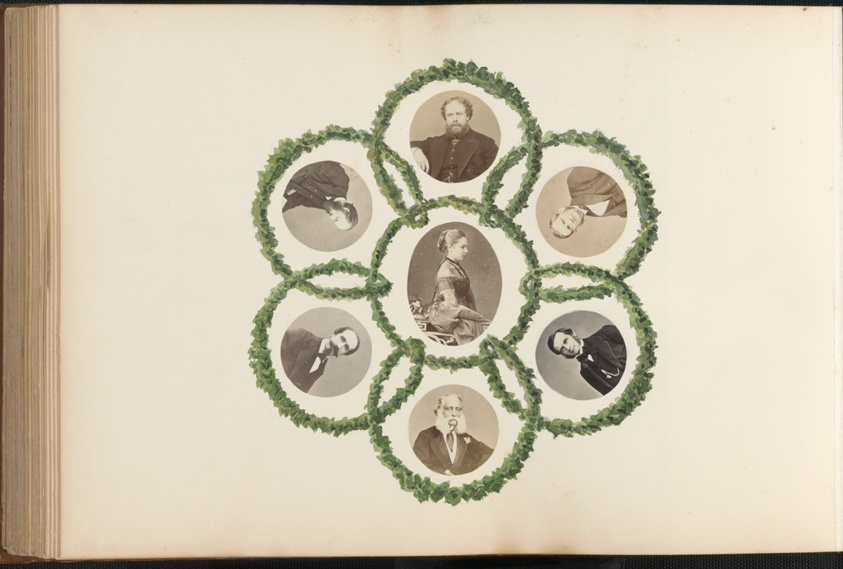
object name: Photograph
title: The Madame B Album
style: 19th century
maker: Marie-Blanche Hennelle Fournier (French, 1831–1906)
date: 1870s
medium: Albumen prints with watercolor (in album)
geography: France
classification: photograph; albumen silver print; photography